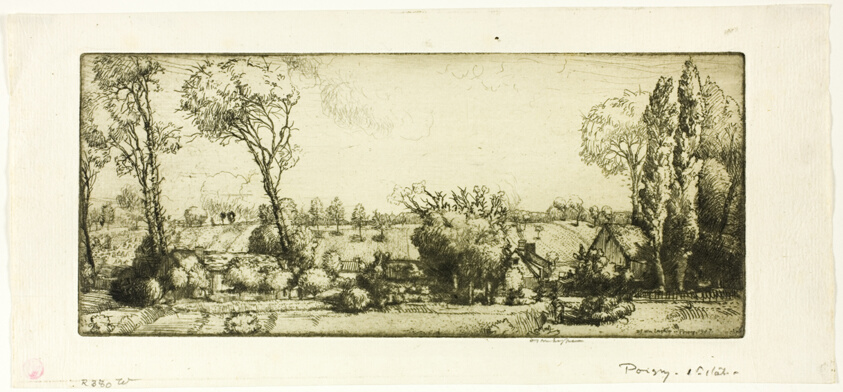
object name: Print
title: Landscape, Poigny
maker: Donald Shaw MacLaughlan (American, born Canada, 1876-1938)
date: 1907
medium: Etching in black on ivory laid paper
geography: United States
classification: etching; print; prints and drawing